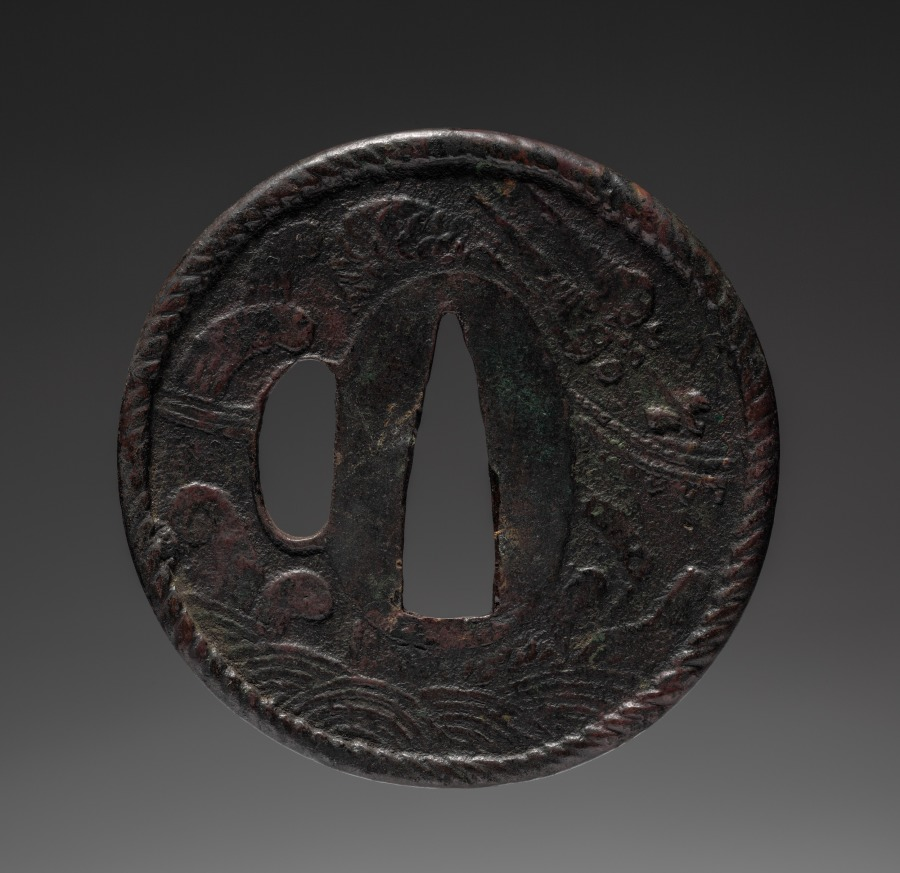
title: Sword Guard (Tsuba) with Dragon in Waves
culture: Japan, possibly Edo period (1615-1868)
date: c. 1615–1868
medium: iron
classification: Arms and Armor